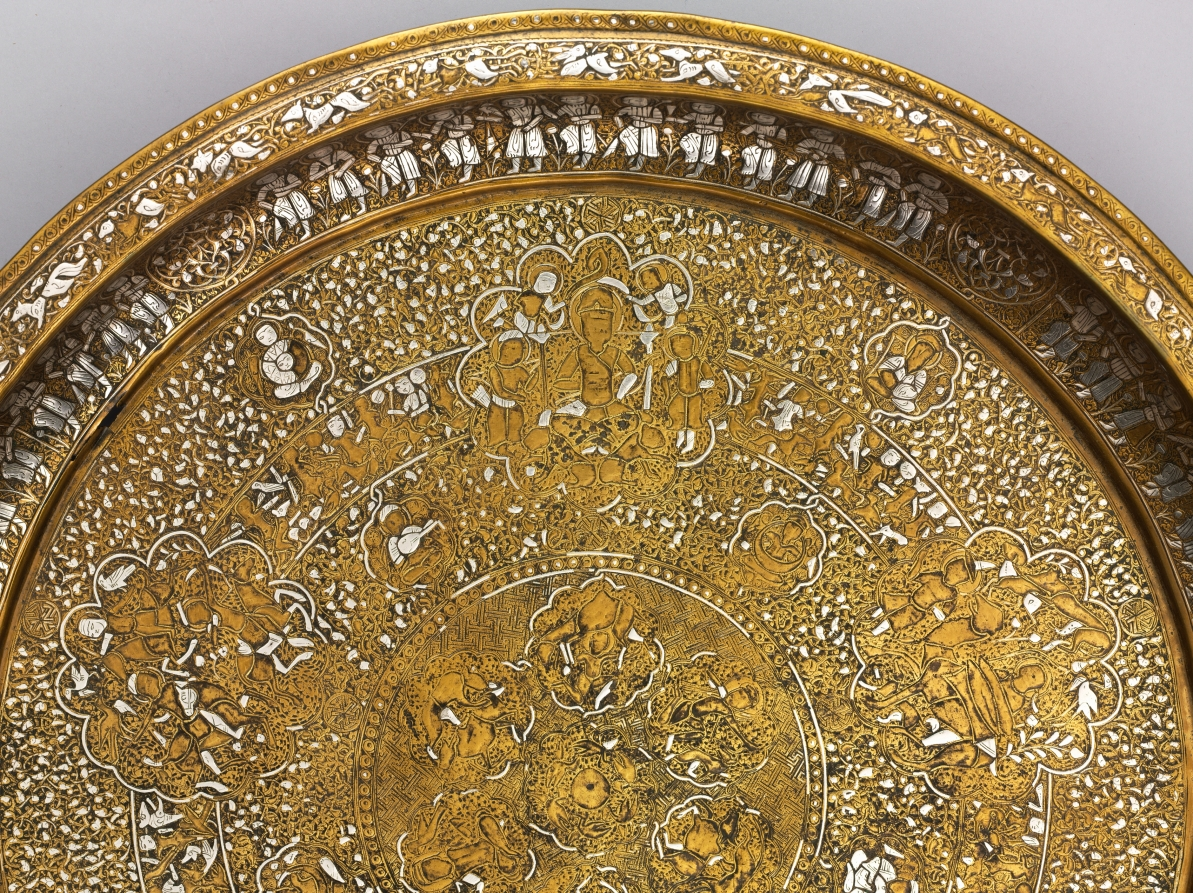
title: Tray Portraying Courtly Pleasures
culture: Syria, Ayyubid period (1171–1260)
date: 1240s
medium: sheet brass inlaid with silver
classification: Metalwork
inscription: The presence of ligatures in the narrow circular bands with interconnected human and animal figures suggests this may be a degenerate form of animated script. It is indecipherable.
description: This tray features images of courtly life interspersed with astronomical symbols. The scenes contained within large multilobed medallions display an enthroned prince with lions at his feet, a banquet, a hunt, dancers, and musicians. Contained within the concentric circles there are also references to solar and lunar motifs, including figures holding sunbursts and lunar crescents. This tray is made of a single sheet of brass and the silver inlay, which is best preserved on the tray’s inner curve, suggests its original brilliance.